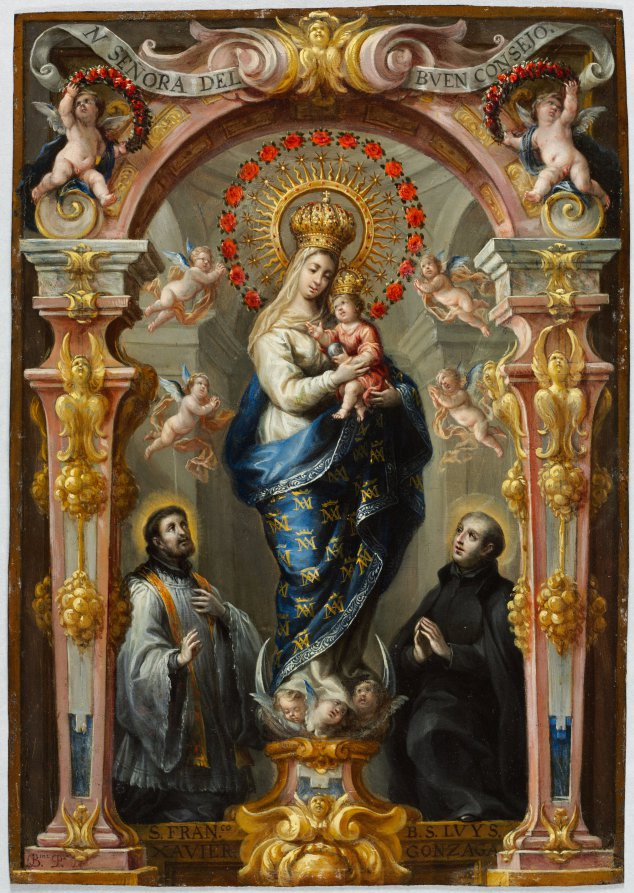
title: Our Lady of Good Counsel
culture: Spain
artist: Bartolomé Pérez (Spanish, 1634–1693)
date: c. 1680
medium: oil on copper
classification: Painting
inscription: Signed lower left: "B.me. P.z D." In ribbon on top: N. Señora del /Buen Consejo Under figure at left: S. Franco Under figure at right: B.S. Luys. Gonzaga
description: This painting loosely and inventively depicts an actual chapel in the former Jesuit Imperial College in Madrid, which housed a Madonna and Child in gilded and painted wood, a focus of popular devotion. Pérez made temporary decorations for the Spanish court, none of which survive, but the fanciful architecture, curiously inverted obelisks, fruits and flowers, and pastel colors all stem from this side of his work. By representing a polychrome sculpture in two dimensions, Pérez further blurred boundaries between painting and sculpture. This intersection of the spiritual and the real worlds was important in Spanish art of the 1600s.